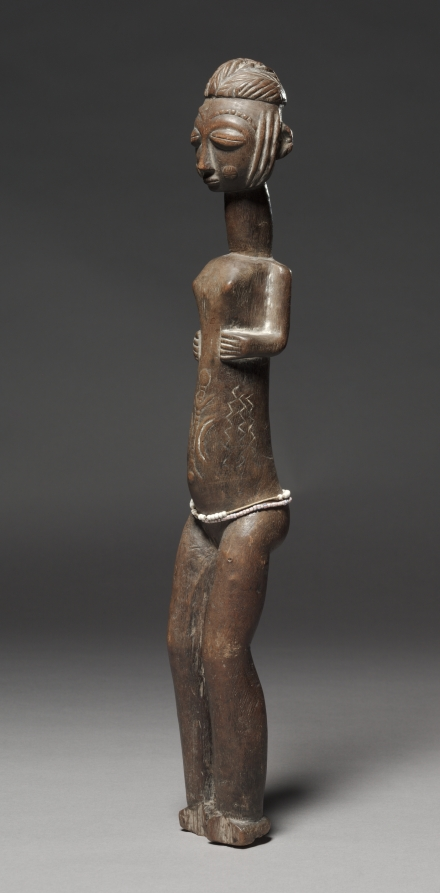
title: Female Figure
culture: Africa, West Africa, Côte d'Ivoire, possibly Bondoukou region, unknown maker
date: late 1800s–early 1900s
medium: Wood, paint, glass beads, and natural fiber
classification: Sculpture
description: An artistic melting pot, the Bondoukou region in northeastern Côte d’Ivoire near the border with Ghana is inhabited by several ethnic groups whose cultures and artistic styles often intermingle. This figure’s rounded shapes and delicate surface decoration––which seem to imitate body scarifications––closely resemble the style of Baule carvings. The figure’s meaning and function remain a mystery.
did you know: Artworks from different regions traveled across Africa; while found in Wenchi, Ghana, this figure was made in nearby Côte d'Ivoire.